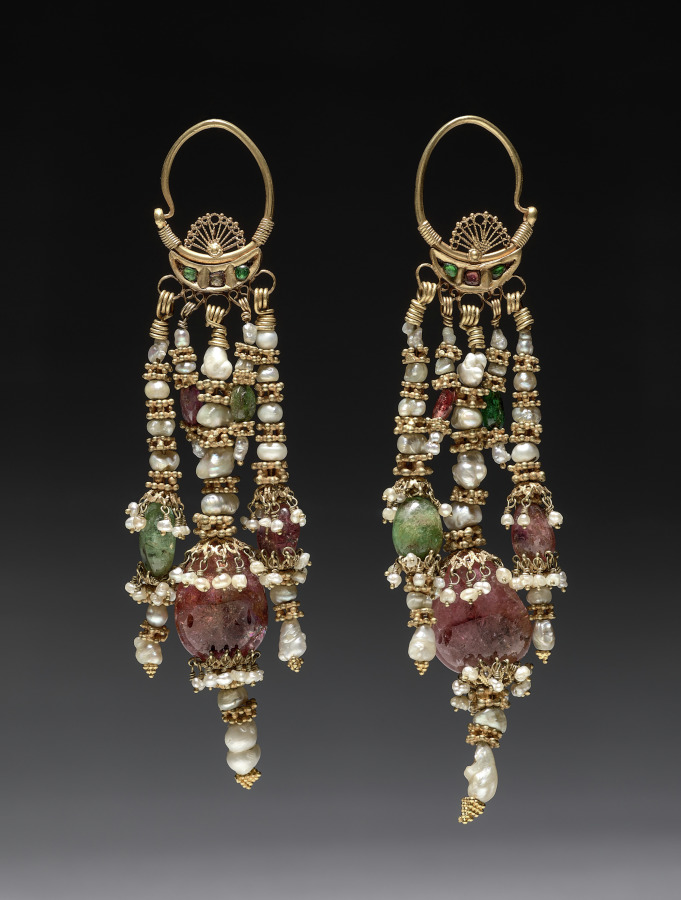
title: Pair of Earrings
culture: Uzbekistan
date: 1700s–1800s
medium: silver gilt with pearls, gold beads and crystal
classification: Jewelry